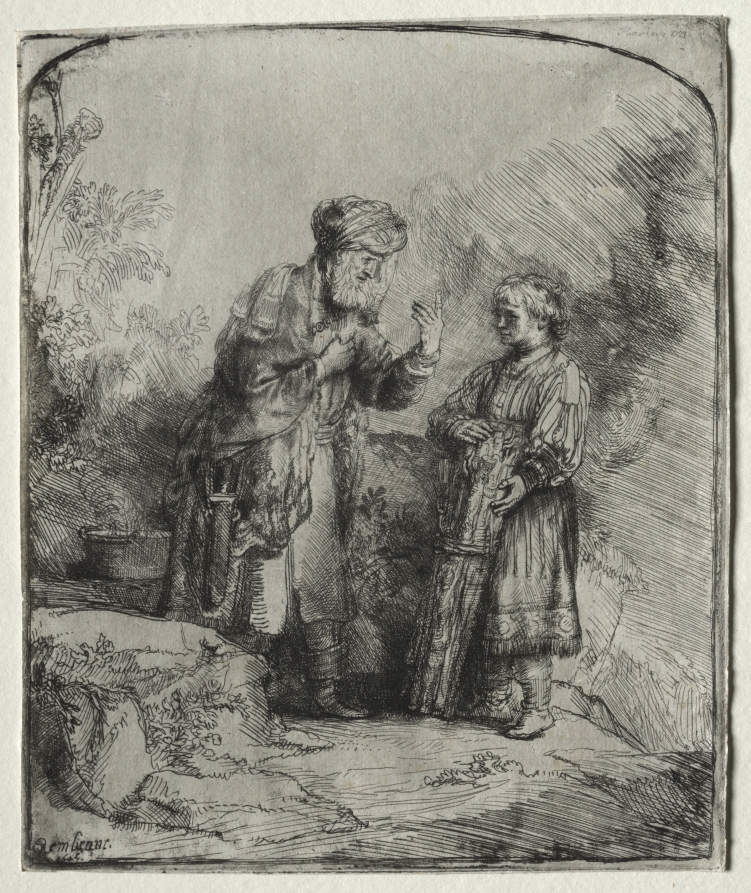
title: Abraham and Isaac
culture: Netherlands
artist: Rembrandt van Rijn (Dutch, 1606–1669)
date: 1645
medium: etching with drypoint and burin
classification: Print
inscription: lower left, in plate: Rembrant. / 1643. ; upper right, in graphite: Haring [illegible] ; VERSO, lower left, in graphite: 38 ; lower left, in graphite: 32 ; lower center, in graphite; B 34 ; lower center, in graphtie: 21 ; lower left, in graphite (erased)